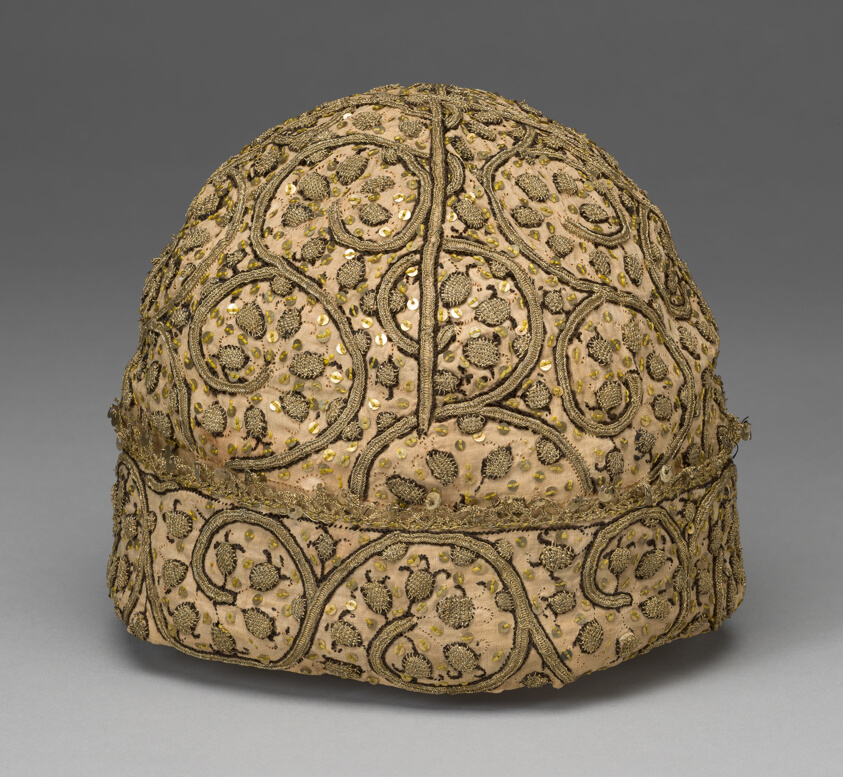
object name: Costume and Accessories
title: Man's Cap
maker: England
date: 1575/1600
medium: Linen, plain weave; embroidered with silk, gilt-strip-wrapped silk, and metal paillettes in ladder and stem stitches; couching and buttonholed couching; edged with bobbin lace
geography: England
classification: textile; costume accessory - headdress; needlework (visual works); costume accessory; costume - needlework; costume; dress (garment); clothing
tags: fashion